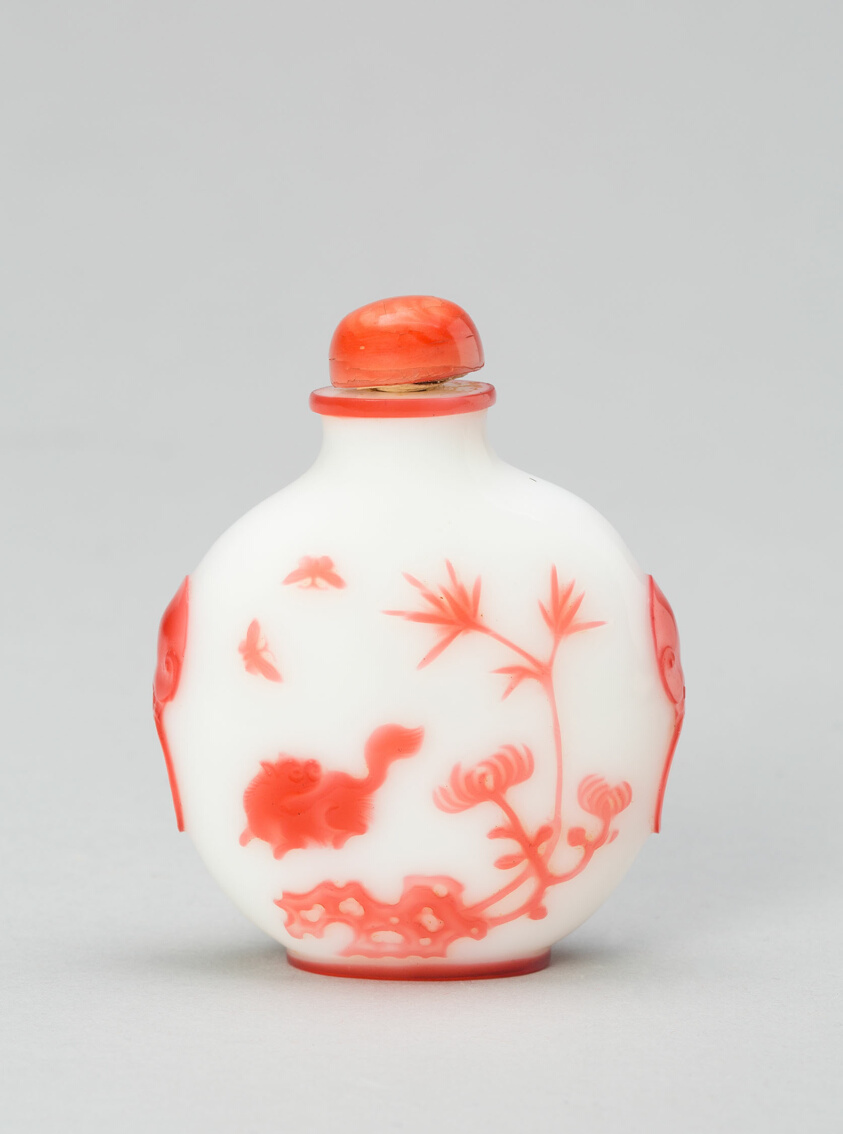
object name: Vessel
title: Snuff Bottle with a Cat and Two Butterflies near Bamboo, Rockwork, and Chrysanthemum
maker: Yangzhou, China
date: Qing dynasty (1644–1911), 1800–1900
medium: Glass; pink overlay on opaque white ground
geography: China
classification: glass; snuff bottle; asian art; vessel